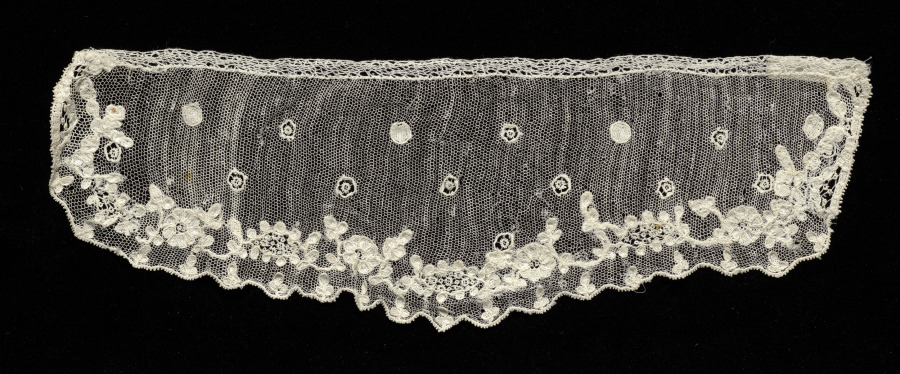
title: Lace Cuff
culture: Italy, Burano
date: 1760–99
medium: Linen: needle lace (Burano Point)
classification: Lace